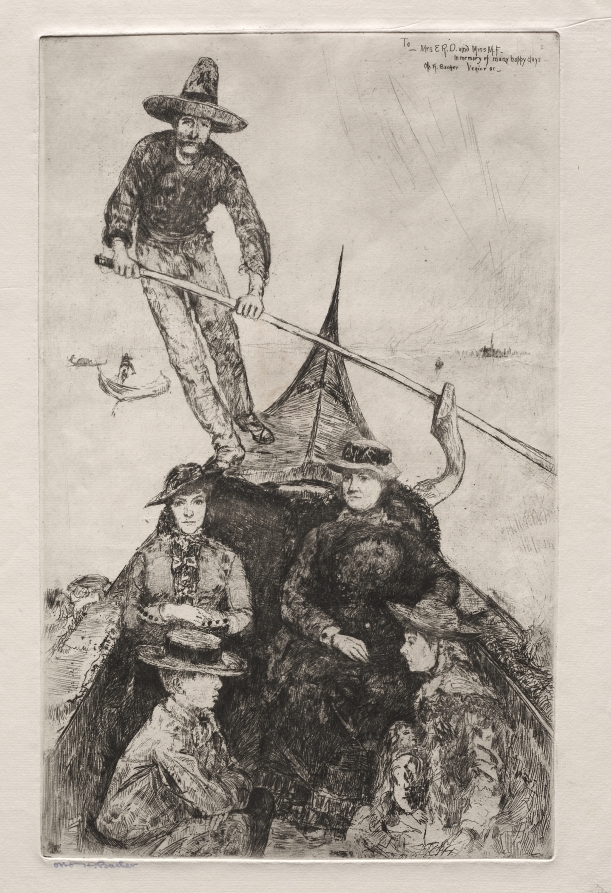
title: Etchings of Venice: Giovanni the Gondolier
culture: America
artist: Otto H. Bacher (American, 1856–1909)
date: 1881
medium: etching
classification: Print